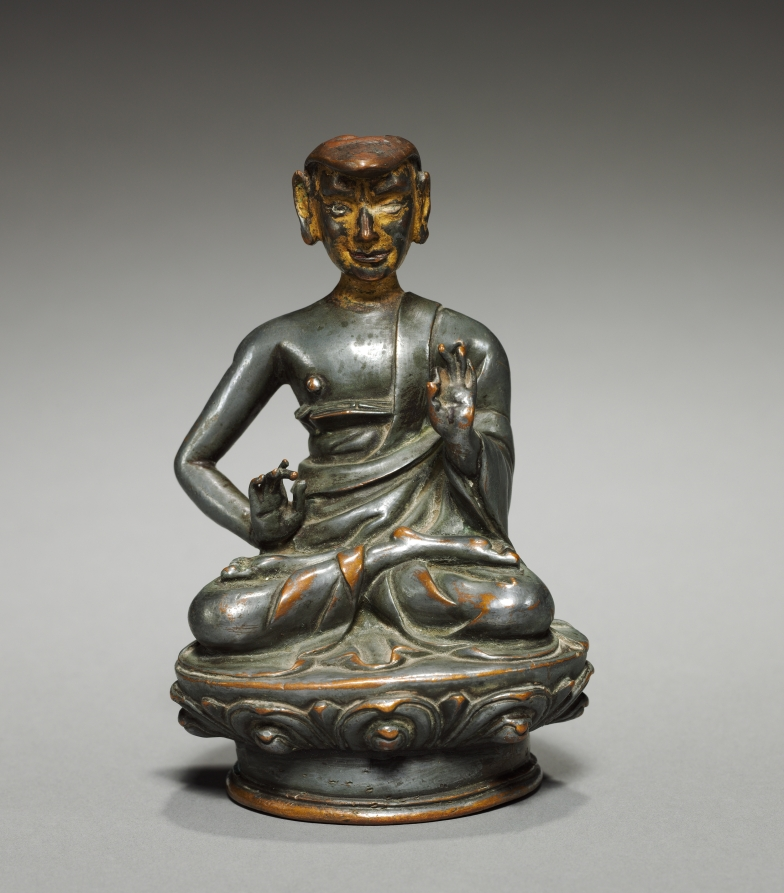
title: Portrait of Dharmakirti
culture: Tibet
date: c. 1400s–1500s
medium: silver-copper alloy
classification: Silver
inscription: Inscribed on the back near the lotus petals: Cho [kyi] Drak[pa]